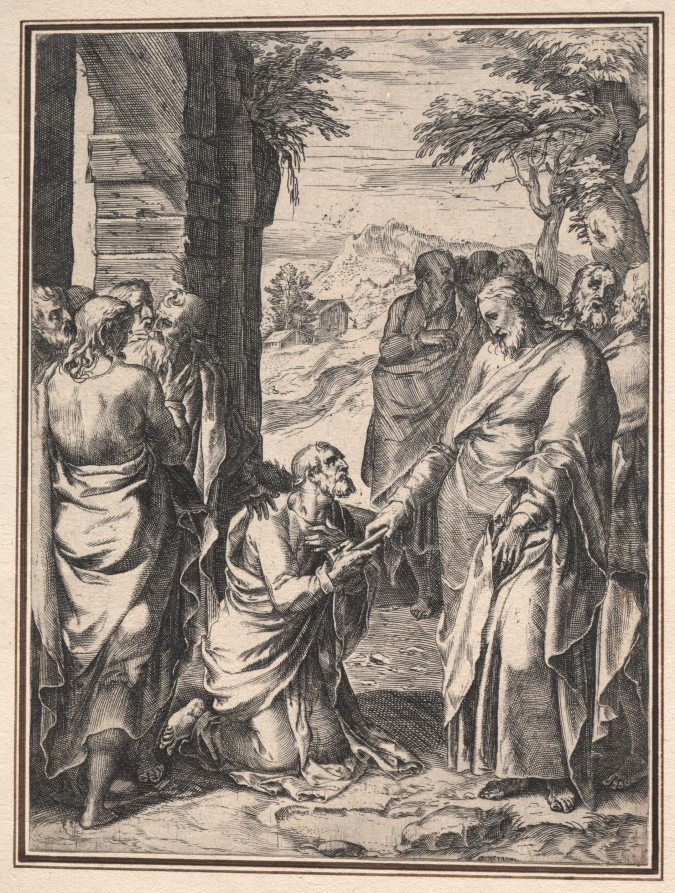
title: Copy of Cornelis Cort: Christ Giving the Key of the Church to Saint Peter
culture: Netherlands (?), 16th century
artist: Anonymous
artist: after Girolamo Muziano (Italian, 1528/32–1592)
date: c. 1567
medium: etching and engraving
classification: Print